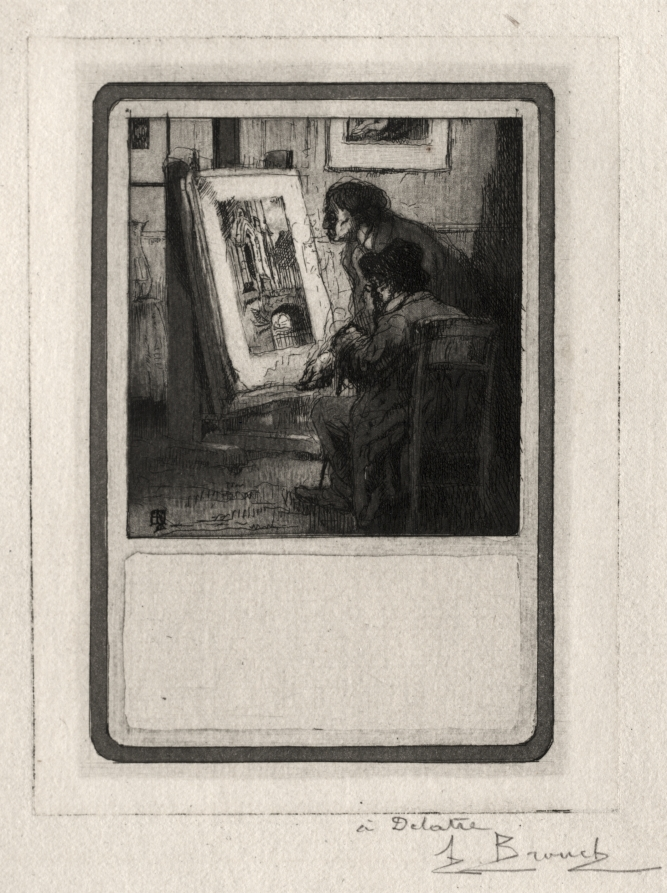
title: The Print Collector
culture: France, 20th century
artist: Auguste Brouet (French, 1872–1941)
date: c. 1902–41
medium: etching and aquatint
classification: Print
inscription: signed in graphite, lower right: A. Brouet / à Delatre